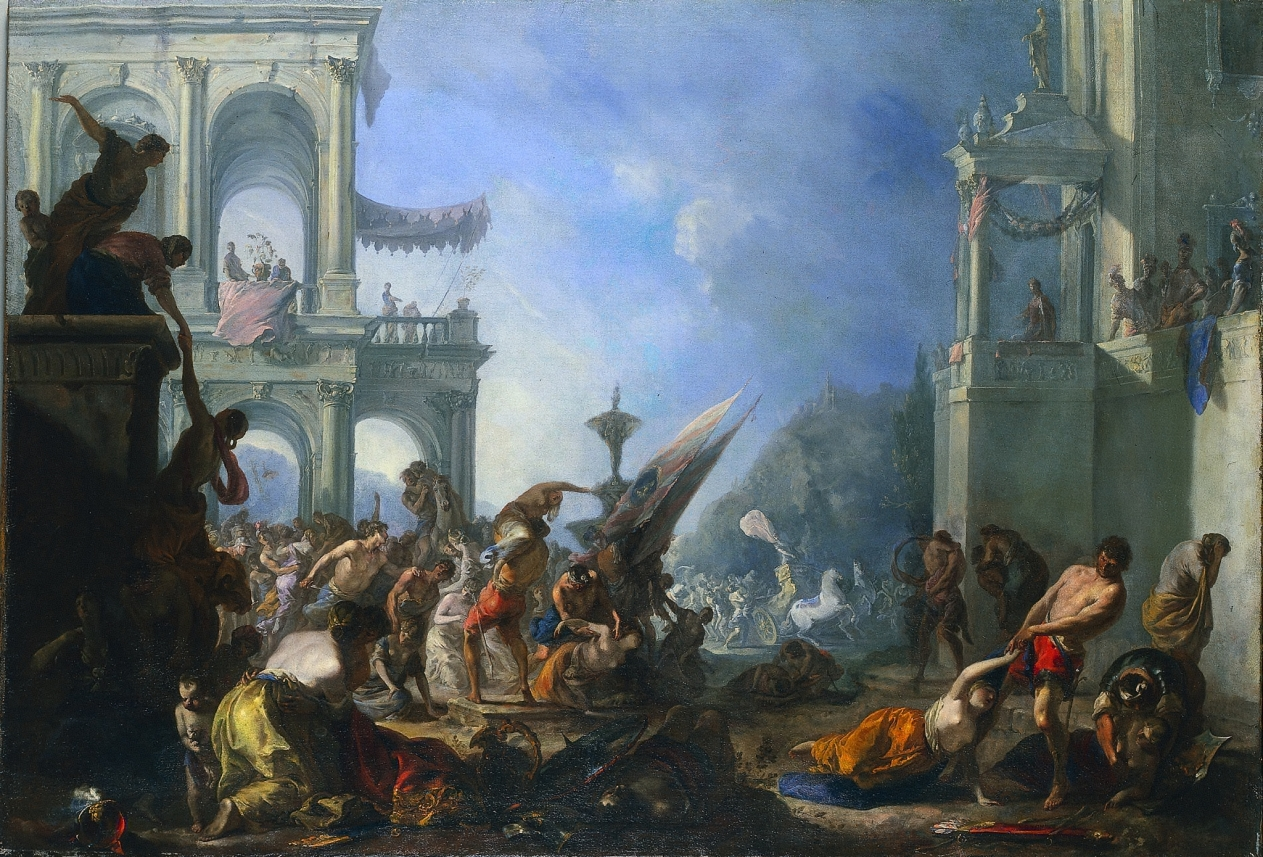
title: Abduction of the Sabine Women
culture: Germany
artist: Johann Heinrich Schönfeld (German, 1609–1684)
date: c. 1640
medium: oil on canvas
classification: Painting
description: Shortly after Rome was founded, the Romans abducted the women of the neighboring Sabines to be their wives. During the ensuing war, the Sabine women intervened, making peace between the two sides. Painted in Naples, this canvas seems to be the last of four versions of the subject painted by Johann Schönfeld (two in the Hermitage, St. Petersburg, another in a private collection).